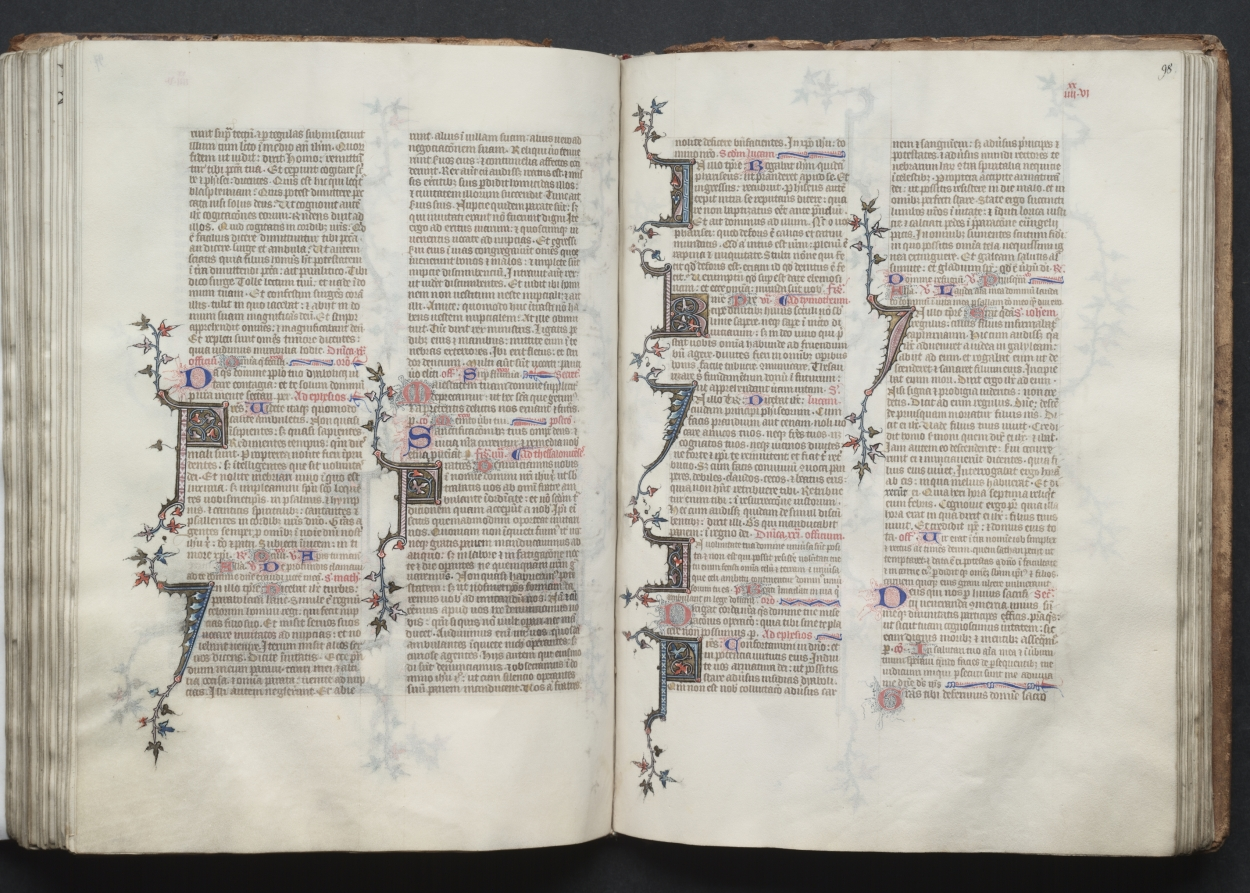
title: The Gotha Missal: Fol. 97v, Text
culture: France, Paris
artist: Master of the Boqueteaux (French)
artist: and Workshop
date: c. 1375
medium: ink, tempera, and gold on vellum; blind-tooled leather binding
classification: Bound Volume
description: The style and quality of this manuscript's decoration is typical of deluxe Parisian books made for aristocratic or royal patrons. Most of the book's decoration appears to be the work of the Master of the Boqueteaux, an artist active at the court of King Charles V (died 1380). His style was apparently shared by a number of book illuminators working in and around Paris. It is very possible that the Gotha Missal belonged to Charles V, but is not provable because the manuscript has no royal portraits and lacks a colophon. Given the book's magnificent decoration, however, it would seem that it was produced for a Valois prince, if not for the king himself. The manuscript receives its name from the German dukes of Gotha, its later owners.